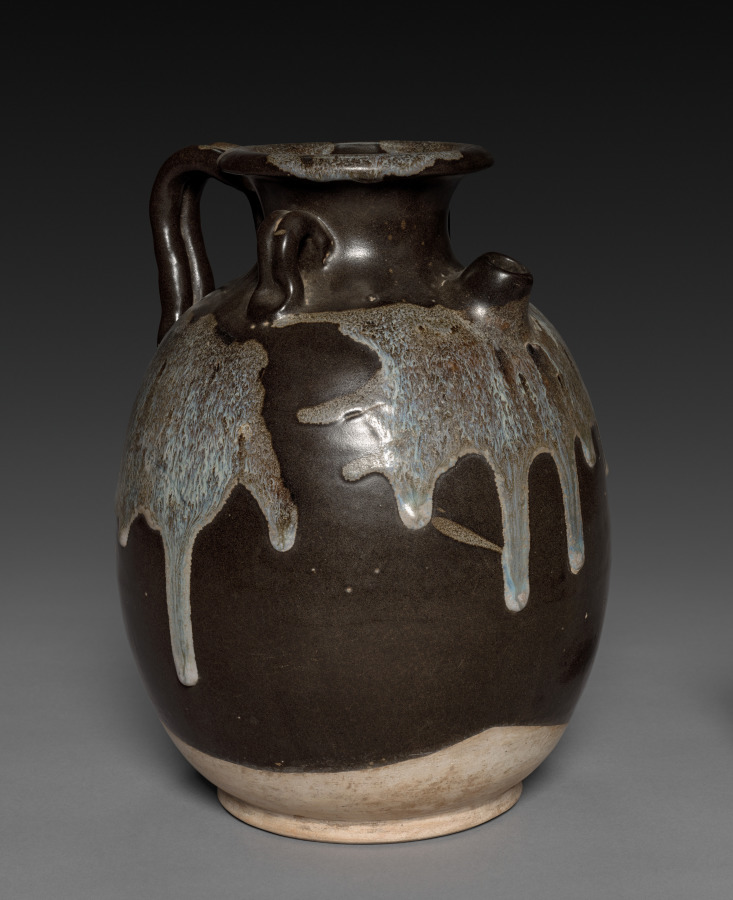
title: Ewer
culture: China, Tang dynasty (618–907)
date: 618–907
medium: Glazed stoneware, Huangdao ware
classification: Ceramic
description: The splashes of color on the dark glaze were achieved by sprinkling the wood ash on the black-brown glaze before firing. This local ware may be considered a predecessor of Jun ware, which was produced in the same region and was sometimes decorated by splashing.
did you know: This vessel was made during the Tang Dynasty, a golden age of culture.